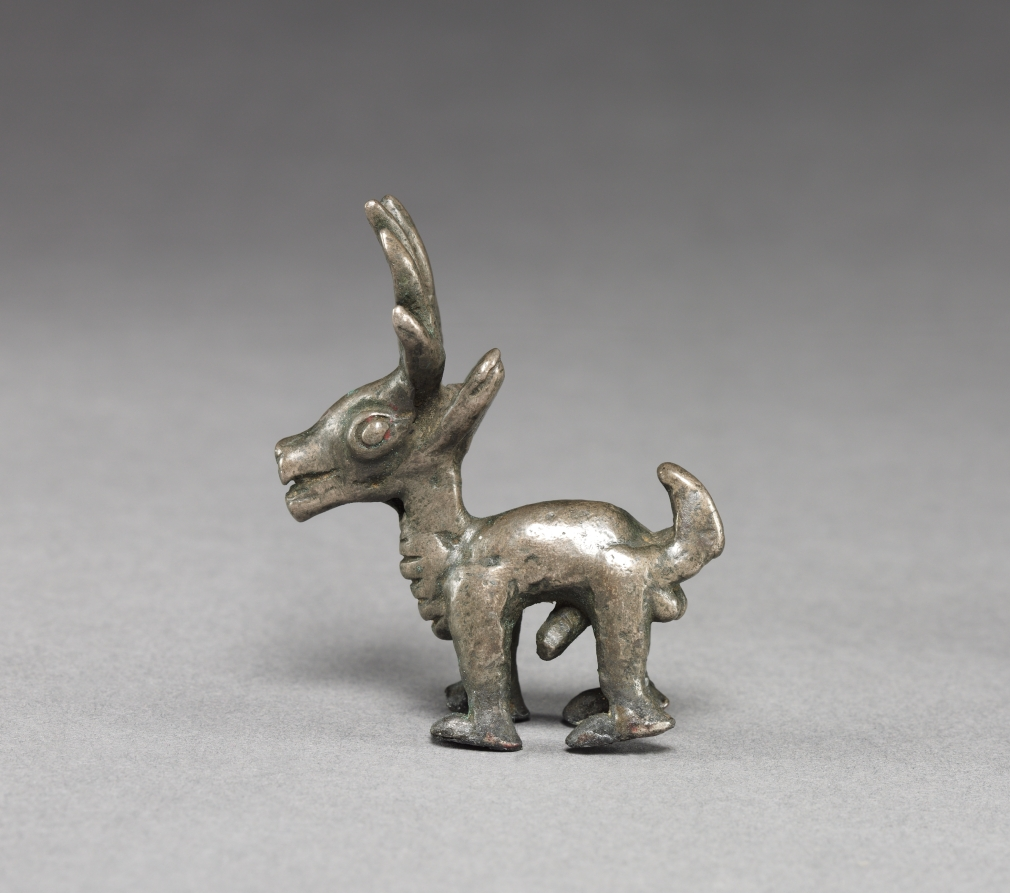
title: Deer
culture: Peru, Ica Valley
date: 1000–1532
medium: silver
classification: Metalwork